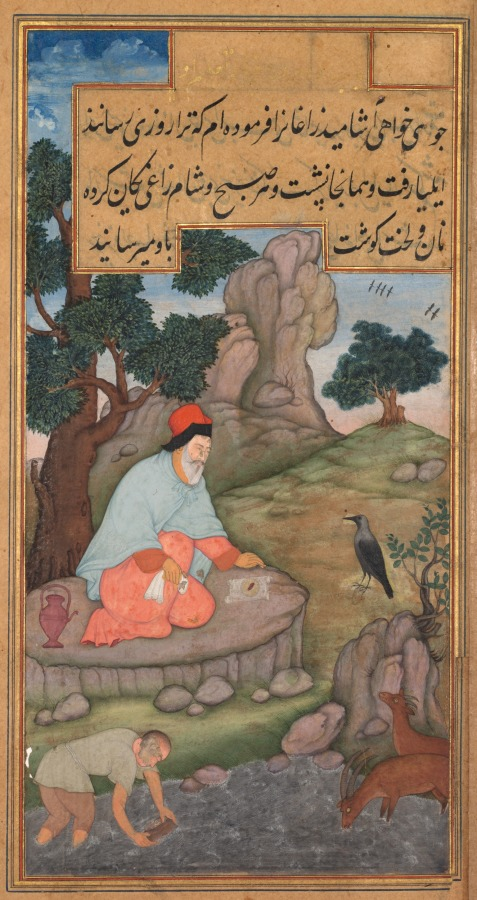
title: A raven brings food to Elijah (folio 72 recto), from a Mirror of Holiness (Mir’at al-quds) of Father Jerome Xavier,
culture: Mughal India, Allahabad, made for Prince Salim (1569–1627)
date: 1602–4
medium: Gum tempera, ink, color, and gold on paper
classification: Manuscript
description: The Old Testament prophet Elijah sits like an Indian holy man on a raised rocky platform under a tree. A raven has come to bring him bread and meat until the river runs dry, as commanded by God. Father Jerome recounted the story of Elijah to explain a reference made by Jesus in the context of his being rejected by the people of Nazareth, where he grew up. The unusual combination of Elijah’s salmon pink and light blue garments draws the viewer’s attention to him as the focus of the composition and echoes the paler hues of the sky.